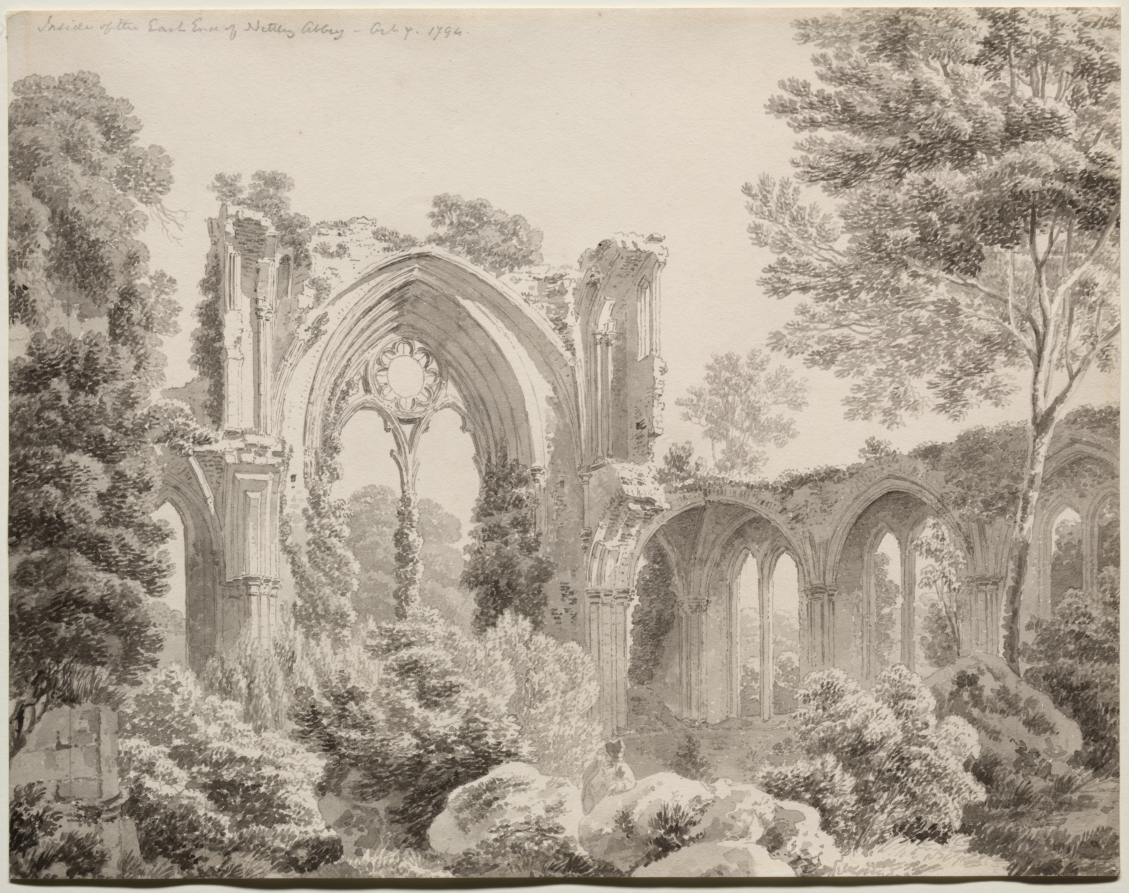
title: Inside the East End of Nettley Abbey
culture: England, 18th century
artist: Michel Angelo Rooker (British, 1746–1801)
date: 1794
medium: gray wash with extensive point of brush with traces of graphite; squared with graphite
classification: Drawing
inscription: inscribed, in graphite, upper left edge: Inside of the East End of Nettley [sic] Abbey - Oct 7, 1794; inscribed, in graphite, on verso, at center: Inside of the East end of Netley. Abbey Oct 7th 1794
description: By the end of the 18th century, Britain’s medieval ruins had become popular tourist destinations and a rich source of inspiration for Romantic poets and painters, establishing a veritable "cult of ruins." Decaying Gothic architecture set in overgrown landscapes conjured thoughts of the transience of human ambition in the context of eternal nature. In 1755, the writer and Whig politician Horace Walpole described Netley Abbey: "The ruins are vast . . . with all variety of Gothic patterns of windows wrapped round and round with ivy—many trees are sprouted up against the walls and want only to be increased with cypresses! In short, they are not the ruins of Netley, but of Paradise." Michael Angelo Rooker’s drawing gives form to Walpole’s description of his magical visit to the ruined abbey.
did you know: Netley Abbey, seen in this drawing, was a popular subject in art and literature at the time Michael Angelo Rooker depicted it.